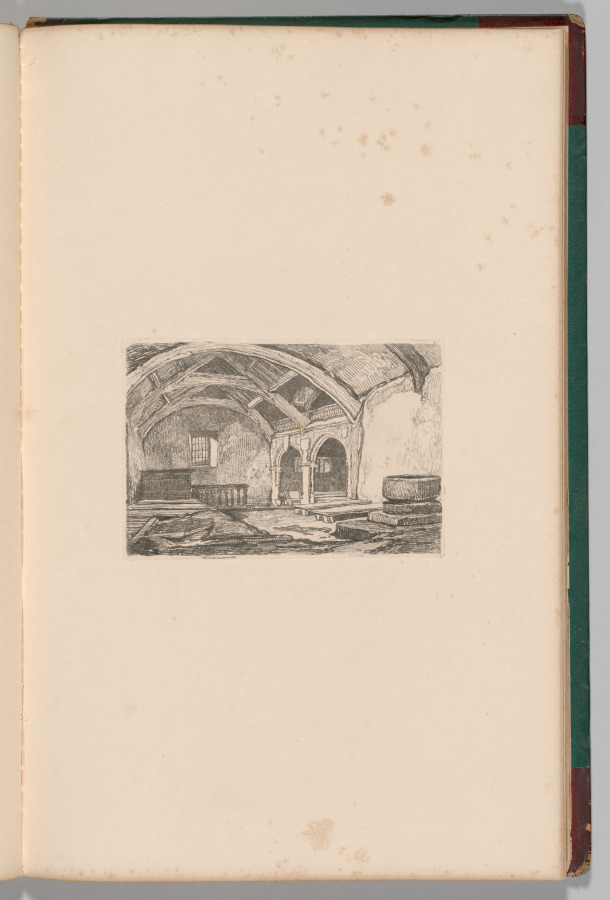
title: Liber Studiorum: Plate 42, Capel Carrig, Caernarvonshire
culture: England, 19th century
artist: John Sell Cotman (British, 1782–1842)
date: 1838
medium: softground etching, from a bound volume containing 48 plates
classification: Bound Volume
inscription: In plate, within image, upper right: 42; in plate, below image: Capel-Carrig, Caernarvonshire. J S Cotman